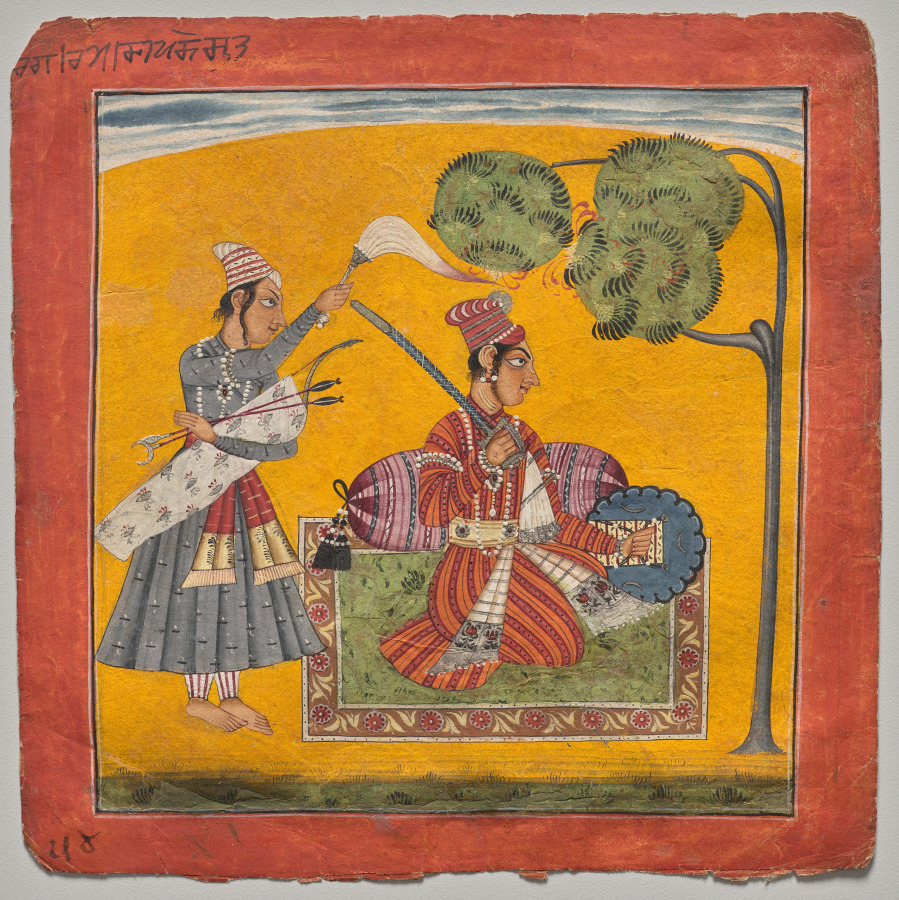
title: Dipak Raga, One of the Thirty-Six Melodies (Ragamala): Personifying Love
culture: Northern India, Himachal Pradesh, Pahari kingdom of Basohli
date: c. 1690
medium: Gum tempera and ink on paper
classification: Painting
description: A nobleman is seated on a carpet, attended by a retainer holding a flywhisk.